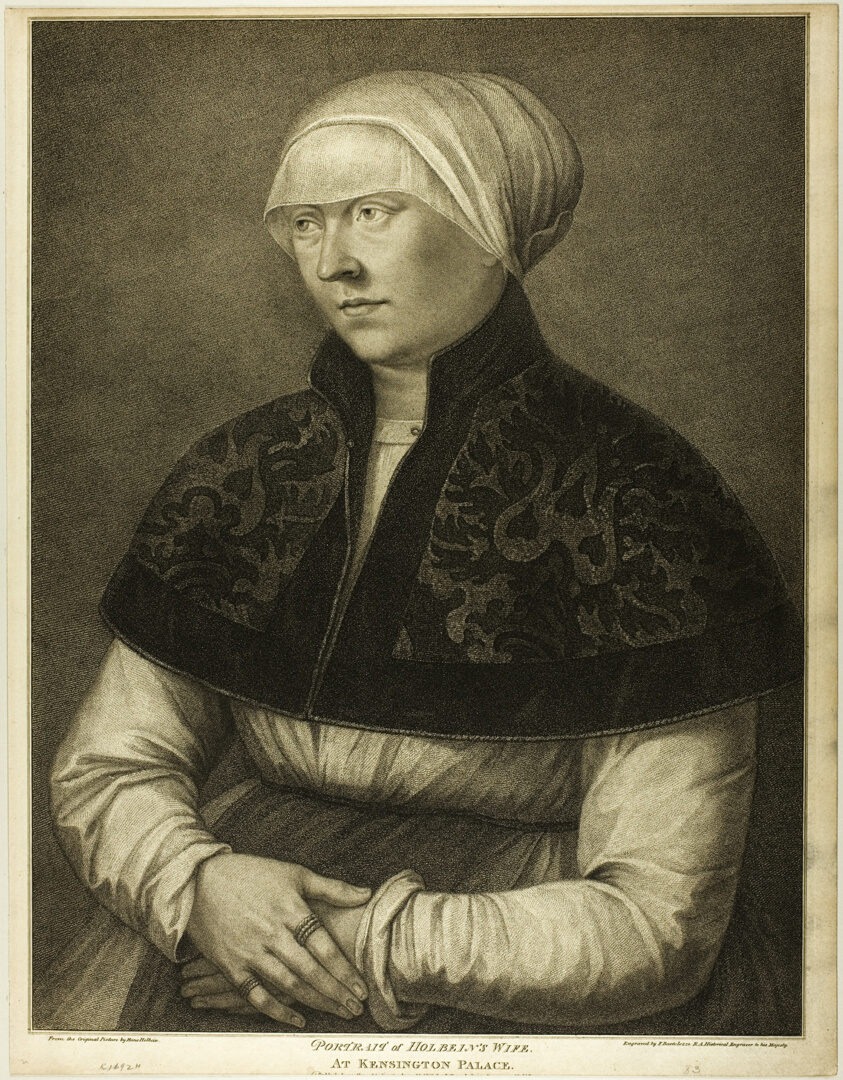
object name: Print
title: Holbein's Wife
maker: Francesco Bartolozzi (Italian, 1727-1815); after Hans Holbein the younger (German, 1497-1543)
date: c. 1798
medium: Stipple engraving on buff wove paper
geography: Italy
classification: engraving; print; prints and drawing